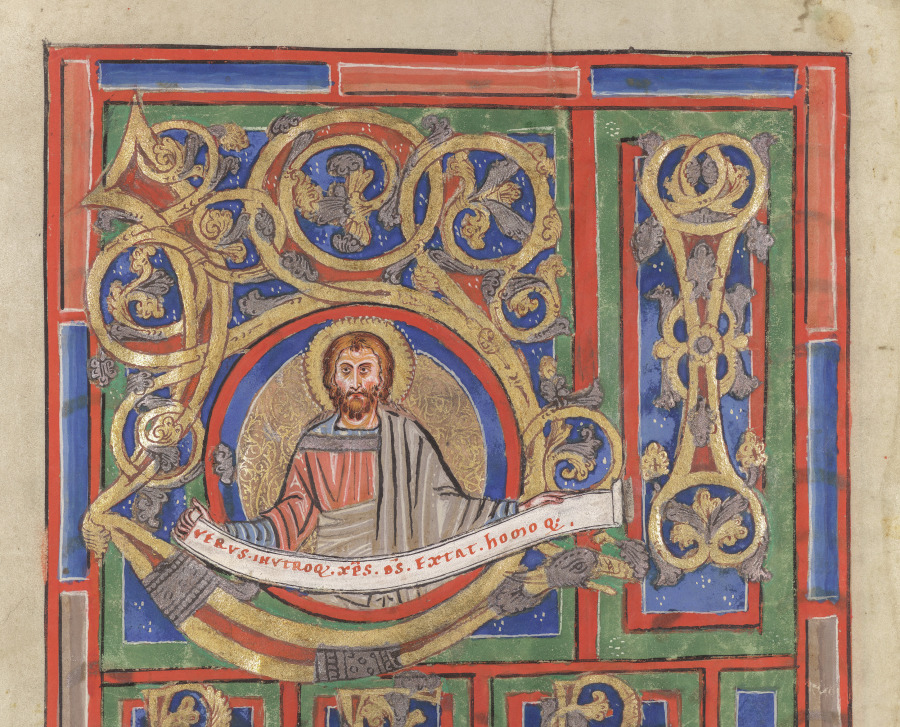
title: Single Leaf Excised from a Gospel Book with Initial L[iber generationis]: St. Matthew (verso)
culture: Germany, Helmarshausen Abbey, 12th century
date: c. 1190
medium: ink, tempera, silver, and gold on vellum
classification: Manuscript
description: This leaf comes from a volume that is preserved in the Trier Cathedral Library in Germany (Codex 142).